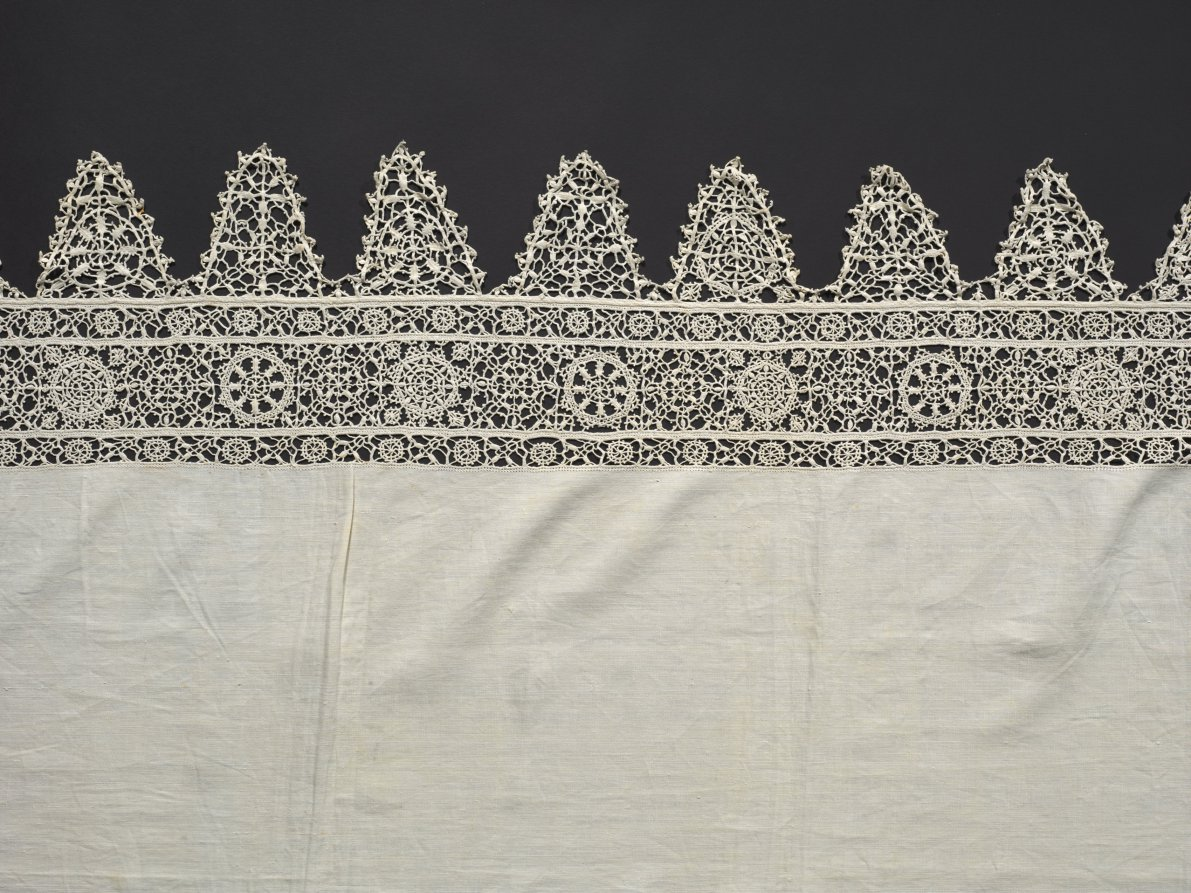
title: Cloth with Lace Edging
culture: Italy, Genoa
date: 1600s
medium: linen: needlepoint lace (reticella) top of linen sheet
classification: Lace